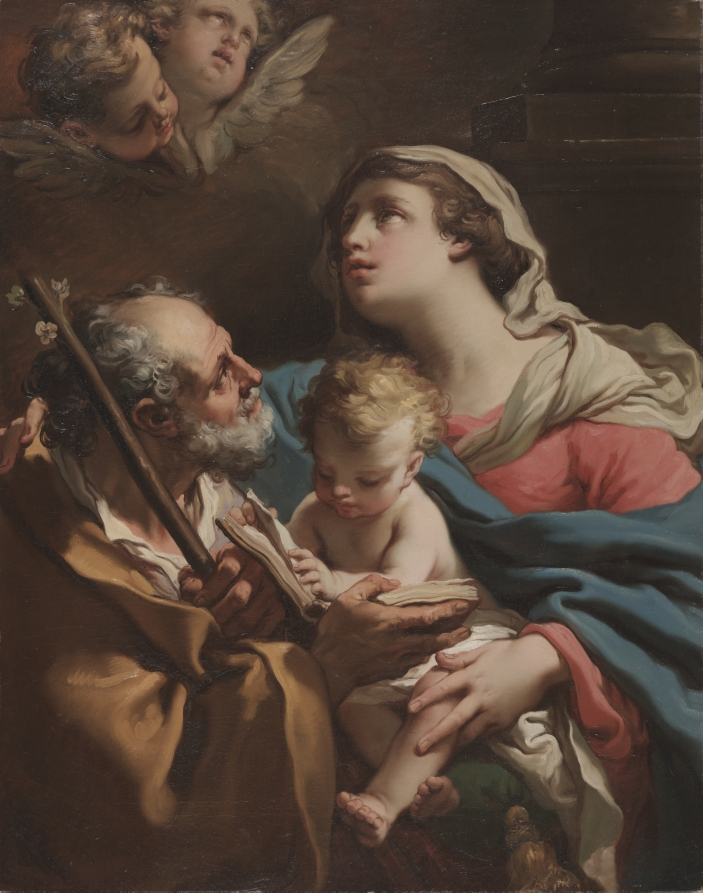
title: The Holy Family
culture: Italy, 18th century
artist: Gaetano Gandolfi (Italian, 1734–1802)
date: 1776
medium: oil on canvas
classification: Painting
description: A work of Gandolfi's later years, The Holy Family was exhibited in the religious festival at the church of San Procolo in Bologna in 1776. The painting's balanced composition, along with the suggestion of emotional connections among the figures, expresses the religious honesty of Gandolfi's art. Here St. Joseph holds the scriptures for the Christ child, who sits on his mother's lap; the elderly Joseph also holds the flowering rod, a sign from heaven that he was chosen to be Mary's husband. Joseph looks with concern toward Mary, who in turn looks up toward the cherubim hovering in a cloud at the upper left. Viewers of the private devotional painting were meant to understand that the young Christ reads of his future in the gospels, and that the suffering he will endure is reflected in Mary's sad gaze. Gandolfi was the most popular member of a prominent artistic family in Bologna. As both draftsman and painter he distinguished himself in religious, mythological, and genre subjects and was admired by his Italian and English patrons. He is known for his down-to-earth naturalism, typical of Bolognese art. The frame—although modern—is a "Gandolfini," so-called because the style was created for paintings by members of the Gandolfi family.